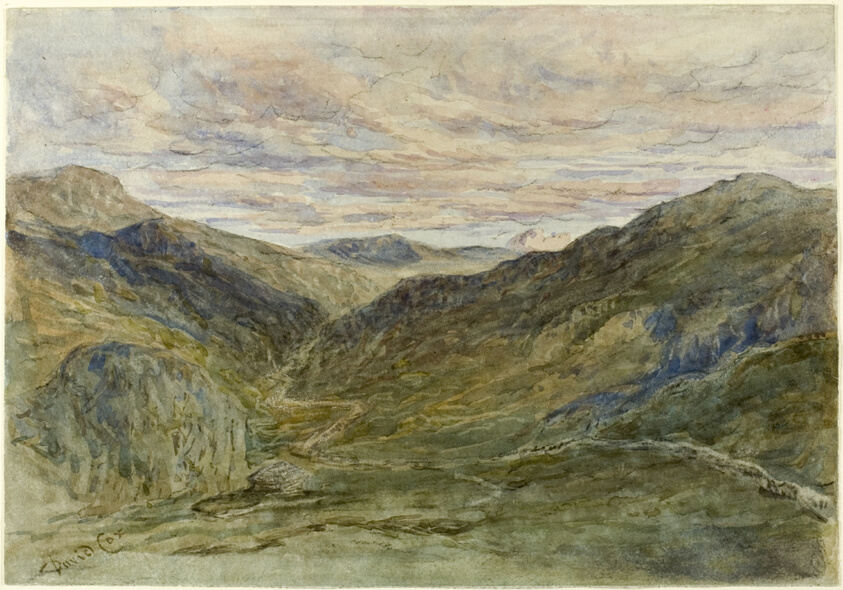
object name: Drawing and Watercolor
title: View in Wales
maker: David Cox, the elder (English, 1783-1859)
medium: Watercolor with black pastel on ivory wove paper, partially laid down on ivory wove paper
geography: England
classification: watercolor; drawings (visual works); prints and drawing